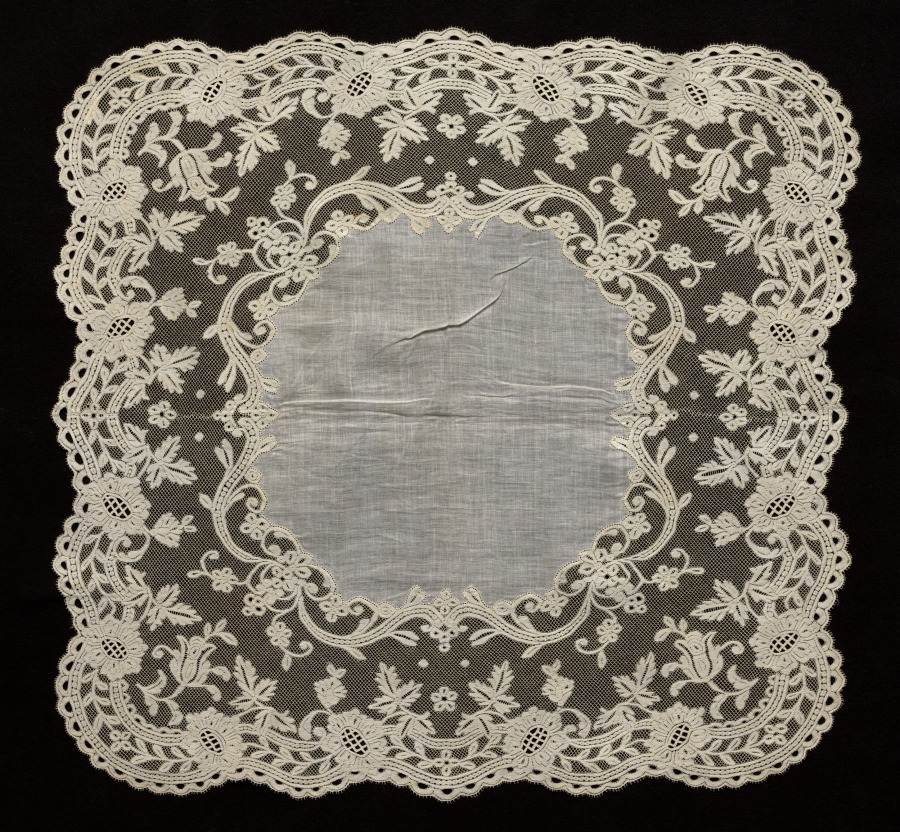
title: Lace Handkerchief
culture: France or Flanders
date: 1800s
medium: Plain weave linen center: bobbin lace (Valenciennes) border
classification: Lace